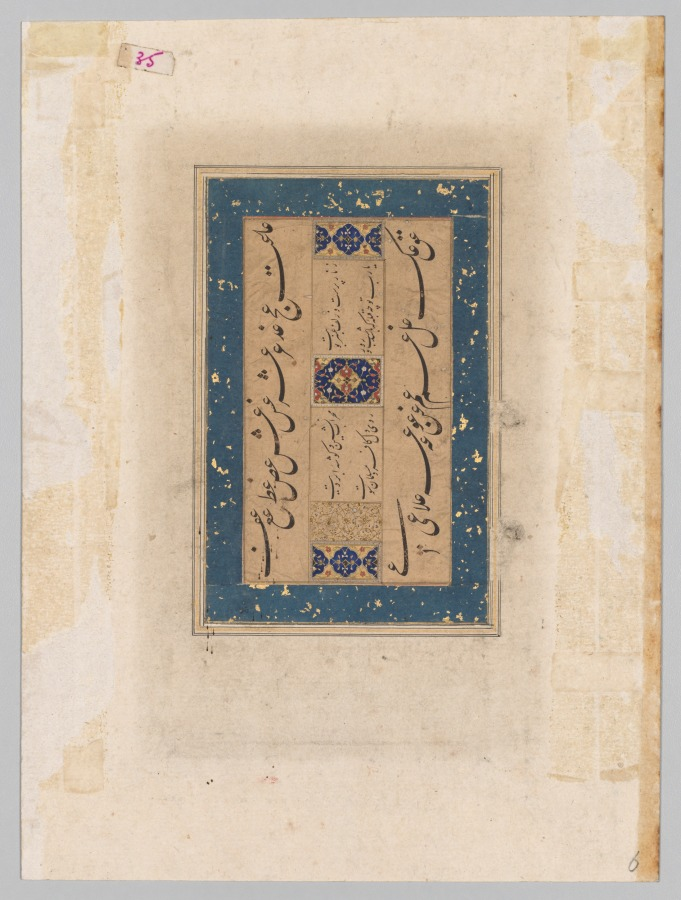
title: Persian ruba‘i (quatrain) by Maulana Muḥammad Murshidi Zawara’i (Persian, late 1500s–early 1600s) (verso)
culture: India, Mughal, 17th century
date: c. 1610–1620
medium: Gum tempera, ink, and gold on paper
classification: Calligraphy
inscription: verso: four lines of nast 'aliq calligraphy with illuminated panels, with illuminated panels, ink gold and opaque watercolor on paper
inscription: Calligraphy in nasta‘liq script: A Christian with his zonnar string and your amber locks, A pious ascetic in a prayer niche and the angle of your eyebrows, O Lord! What kind of a qibla are you That night and day the hearts of both Muslims and Infidels are turned toward you?